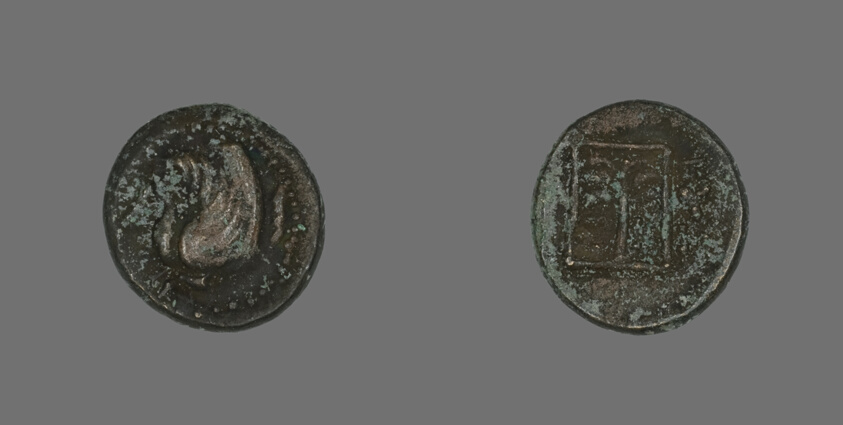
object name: Coin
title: Coin Depicting Pegasus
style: greek, ancient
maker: Greek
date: about 400-310 BCE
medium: Bronze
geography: Ancient Greece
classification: coin; ancient art